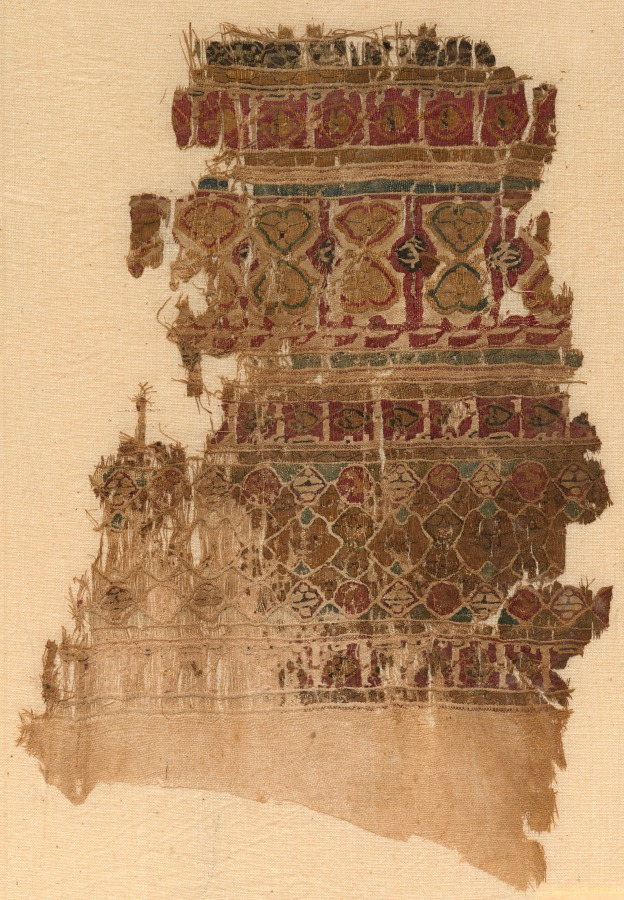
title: Fragment of a Tiraz-Style Textile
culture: Egypt, Fatimid period, 12th century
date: 1100s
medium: linen and silk: tapestry weave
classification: Textile